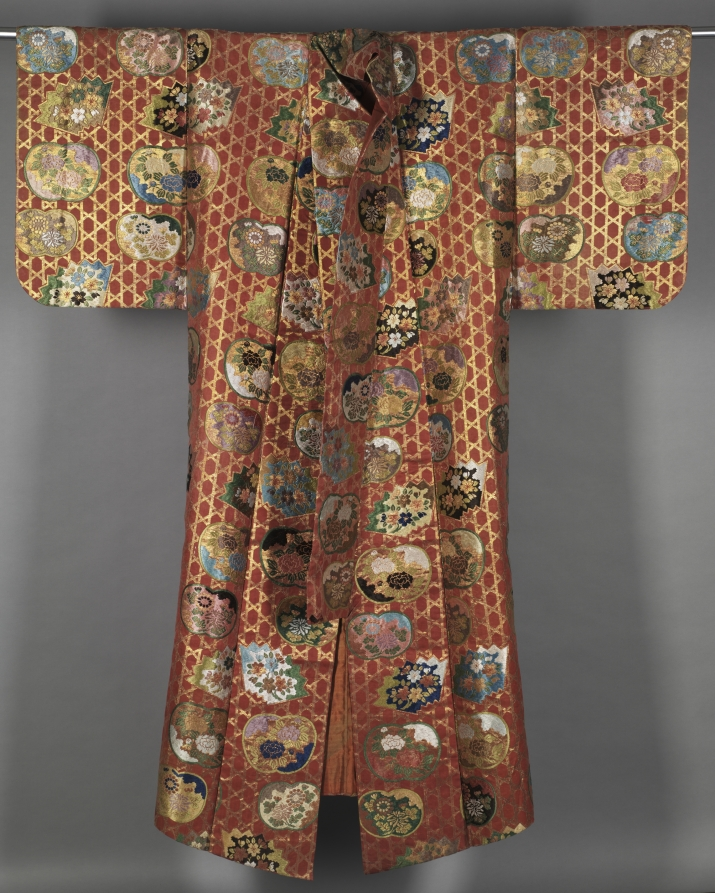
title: Noh Robe (Karaori)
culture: Japan, Edo period (1615–1868)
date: 1800–1850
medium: twill weave with supplementary weft, brocaded; silk and gold thread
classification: Garment